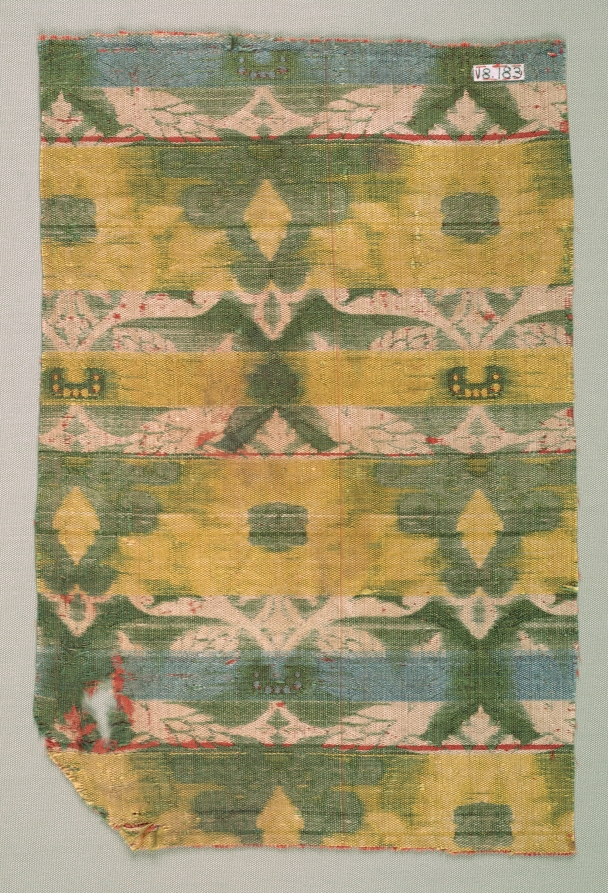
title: Fragment with curving vine and palmette leaves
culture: Spain, Granada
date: 1400s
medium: Silk: lampas weave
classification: Textile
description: The sophisticated combination of elements in this colorful fragment include large split palmette leaves in ivory silk framing yellow interlacing knots in a leafy surround. Prominent floral buds are arranged with dynamic effect in staggered rows. Foral motifs became increasingly prominent on textiles during the 1400s, supplanting geometric patterns.